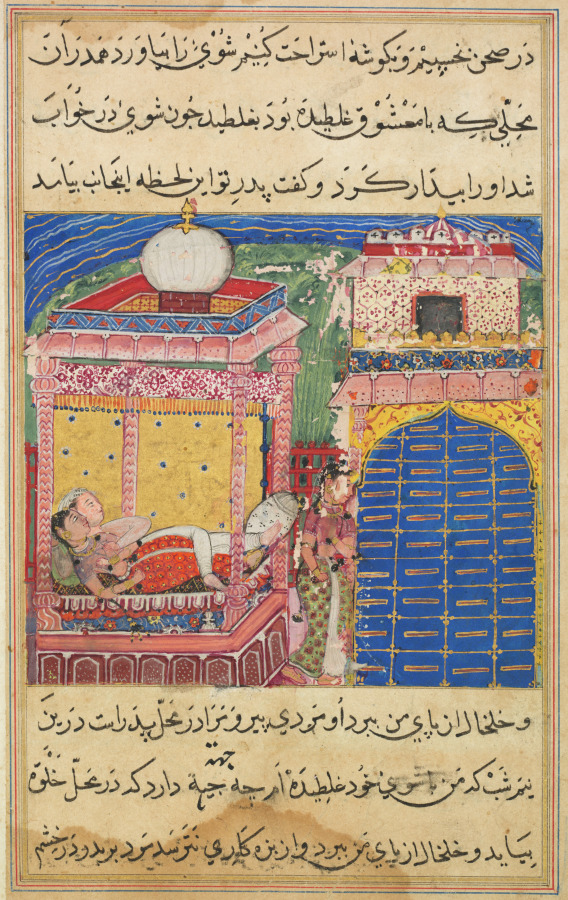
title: The deceitful wife persuades her husband to sleep in the same place where she had previously slept with her lover, from a Tuti-nama (Tales of a Parrot): Eighth Night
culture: Mughal India, court of Akbar (reigned 1556–1605)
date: c. 1560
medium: gum tempera, ink, and gold on paper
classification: Painting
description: In order to preempt the accusations of her father-in-law, the clever wife brought her husband to the same location and slept with him there. When her father-in-law then confronted his son, telling him that he caught his wife in bed with a man by the side of the canal and had her anklet to prove it, the husband simply laughed and said that the man was he, himself. In this manner the clever woman did not get caught in her adultery. The vizier's story convinced the king to doubt the word of his handmaiden and stay the execution of his son. The handmaiden, hearing this, appealed to the king to defend her honor, and he again sent the prince to be executed, at which time the next vizier tells the story of another mendacious woman.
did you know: The striped dome and blue and gold brick pattern are vestiges of an earlier tradition.